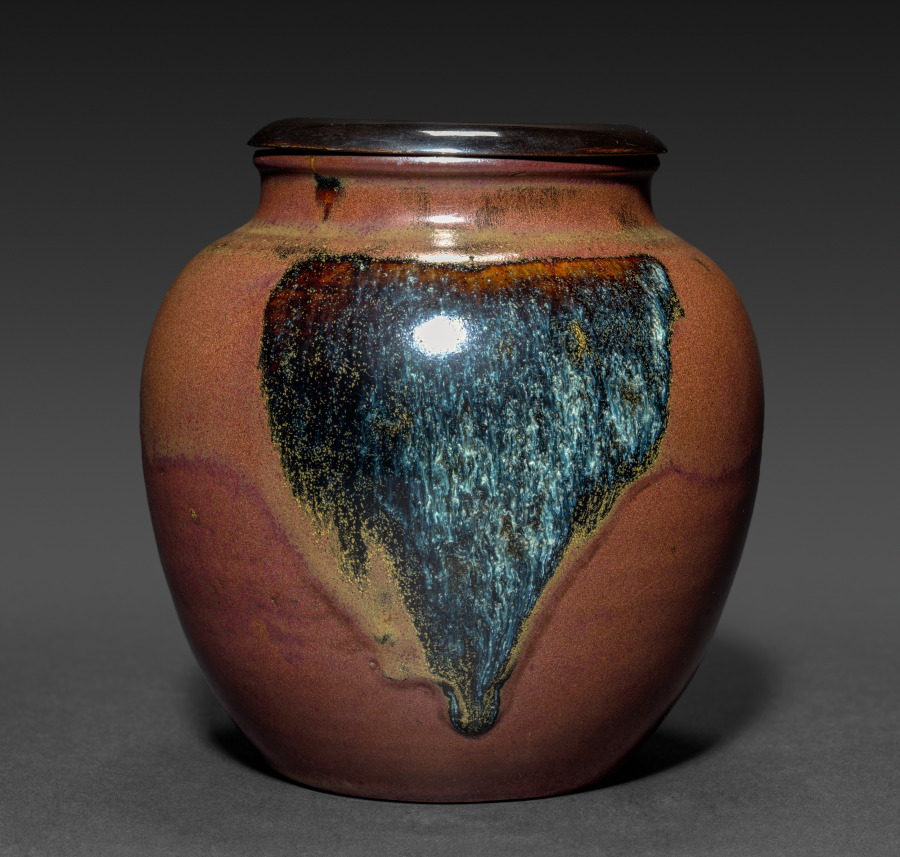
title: Jar with Wooden Cover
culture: Japan, Edo period (1615–1868)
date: 1700s-1800s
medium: pottery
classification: Ceramic